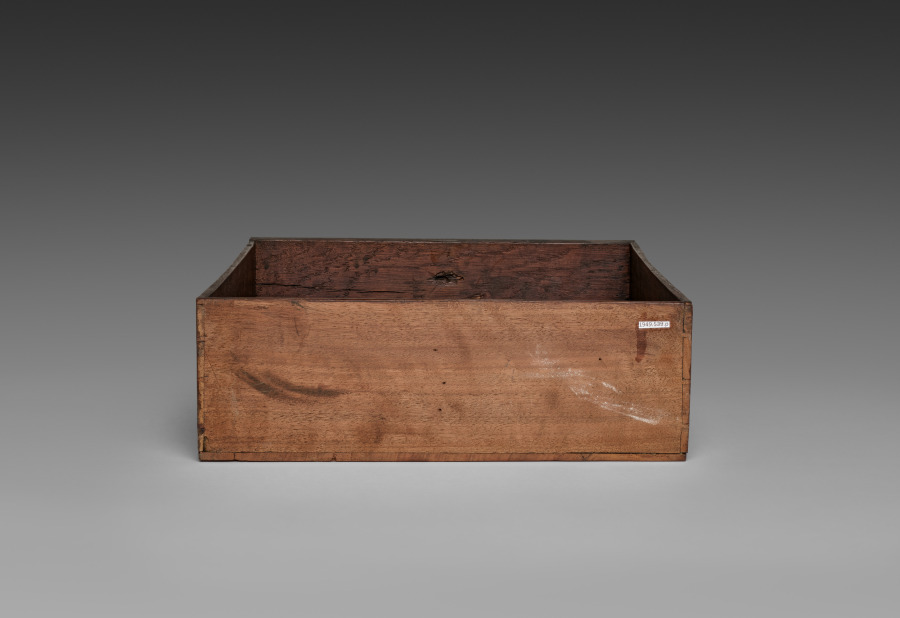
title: Interior Drawer for Cabinet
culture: France, late 17th Century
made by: André-Charles Boulle (French, 1642–1732)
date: c. 1690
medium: ebony, marquetry in metal and tortoise shell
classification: Furniture and woodwork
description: Appointed cabinetmaker to King Louis XIV in 1672, André-Charles Boulle became a master of furniture making in France during the late 1600s until his death in 1732. Known primarily for his use of marquetry, in which metal patterns are inlaid into tortoiseshell then applied within the veneered surface of the furniture, Boulle established a level of quality and craftsmanship few others could achieve. As a result, his work found favor at the royal court and among other aristocrats and diplomats eager to impress the king. The inclusion of a medallion depicting Louis XIV within the bronze decoration of this chest would have identified the owner with the royal court. Often exhibiting stout architectural proportions with elegant groups of inlaid motifs such as the parrot on the central panel of this chest, Boulle’s designs are an example of the intellectual fashion for contrasting ideas, materials, and motifs.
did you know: Originally designed to sit atop an elaborate tall stand, this chest was likely altered in the late 1700s to reduce its scale and height.